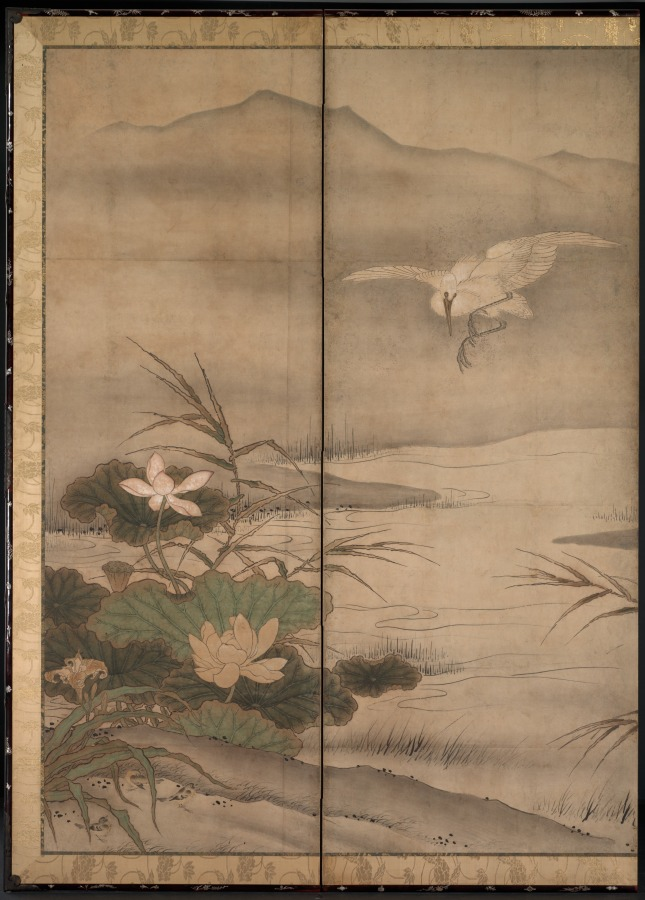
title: Birds and Flowers in a Landscape of the Four Seasons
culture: Japan, Muromachi period (1392–1573)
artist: follower of Sesshū Tōyō (Japanese, 1420–1506)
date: second half of the 1500s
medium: Six-panel folding screen, ink and color on paper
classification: Painting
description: The monk-painter Sesshū is revered today, as he was in his own time. While he left Kyoto's sophisticated intellectual and cultural environment to live in a provincial village in a far western province, he seems never to have severed contacts with the monastic communities of his young adulthood. His residence in Yamaguchi proved fortuitous because his patron, the region's military lord, enjoyed considerable freedom in conducting trade missions overseas with Korea and China. Sesshū went to China in 1467 and traveled about the country, visiting well-known historical sites and Chan (Zen) temples before returning two years later. Thus he became familiar with contemporary painting practices, materials, formats, and subject matter. His assimilation and then transmission of these elements had a profound impact on the following generations of ink painters, patrons, and Zen communities throughout Japan. Despite the presence on these byōbu of the name "Sesshū," they are from the hand of another accomplished but as yet anonymous follower active in the middle of the sixteenth century. Sesshū's name here, as on a handful of similar bird-and-flower byōbu, attests to the master's identification at that time with the colorful mural paintings on the same theme emanating from Ming dynasty China. This genre had heretofore been relegated to hanging scroll compositions, so the intro-duction into temple and daimyo residences of such an attractive theme surely caused considerable excitement in the later fifteenth century, when in all likelihood Sesshū introduced it into the Japanese painting repertoire. Subsequently, artists of varying backgrounds and training tried their hands at these large, dramatic scenes. From right to left the composition portrays an array of flowering plants in the near distance that indicate the passage of the seasons. Birds, usually paired, occupy this setting, engaged in various activities that lend naturalism and an air of peacefulness. The world they inhabit may be characterized pictorially by expansive middle-ground waterscapes that end where the far distant mountains rise as backdrops. These features appear consistently in other bird-and-flower byōbu attributed to Sesshū. Also noteworthy is the absence of any birds of prey such as the samurai's beloved hawks, emblems of fierceness and graceful strength that appear often in the byōbu of sixteenth-century Kano and Soga school painters.